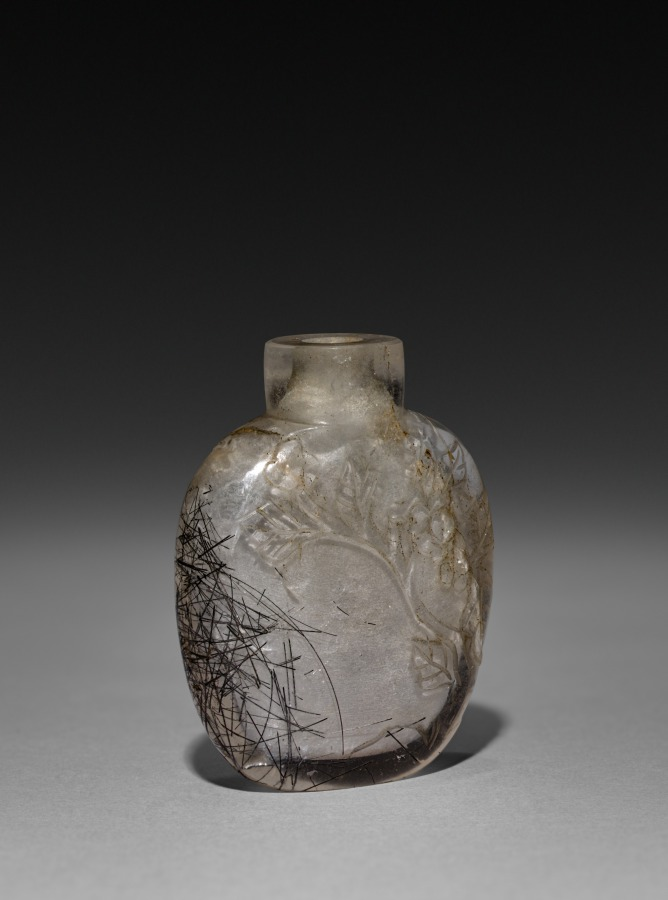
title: Snuff Bottle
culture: China, Qing dynasty (1644-1911)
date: 1644–1911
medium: glass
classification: Glass